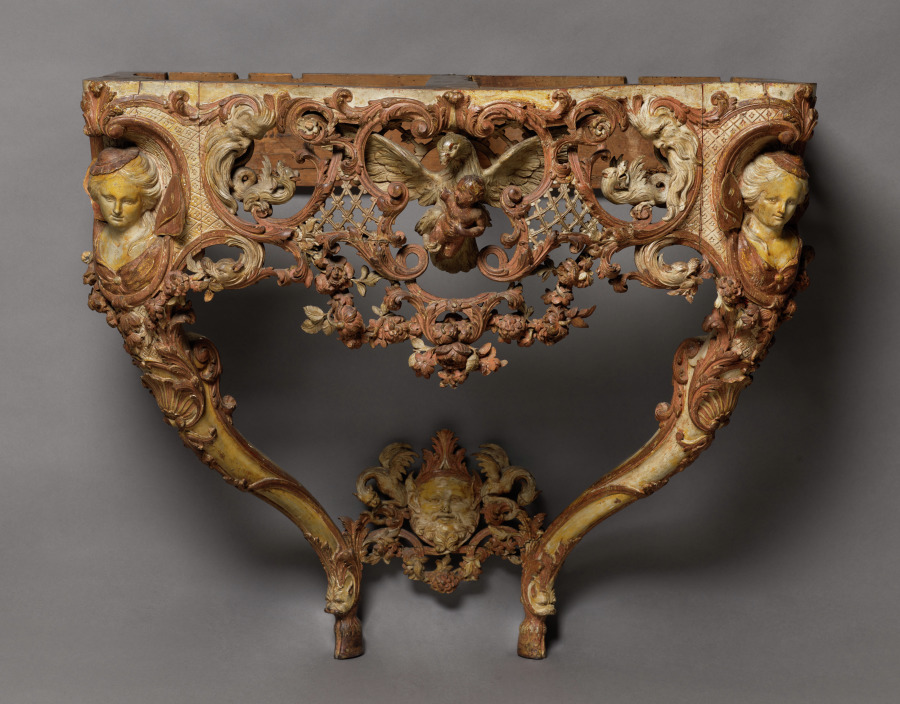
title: Console Table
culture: France, 18th century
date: c. 1720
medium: carved and painted wood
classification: Furniture and woodwork